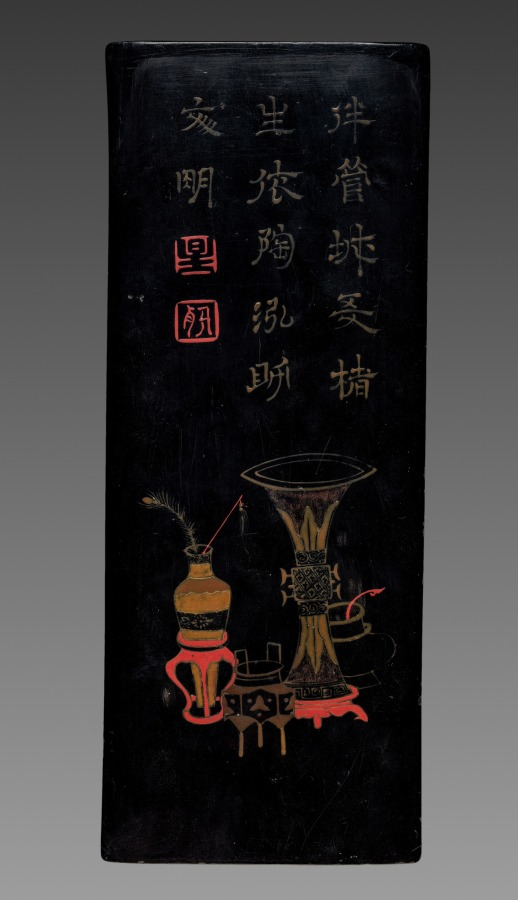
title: Ink Cake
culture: China, Qing dynasty (1644-1911)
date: 19th Century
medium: ink cake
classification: Miscellaneous